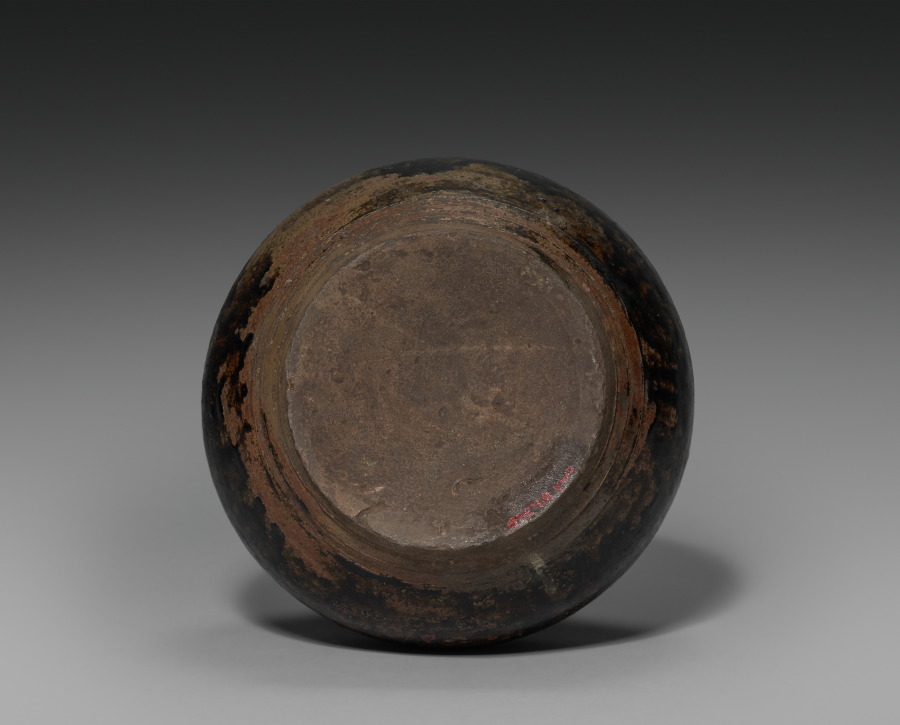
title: Khmer Vase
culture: Cambodia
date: 1100s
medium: earthenware with dark brown glaze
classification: Ceramic